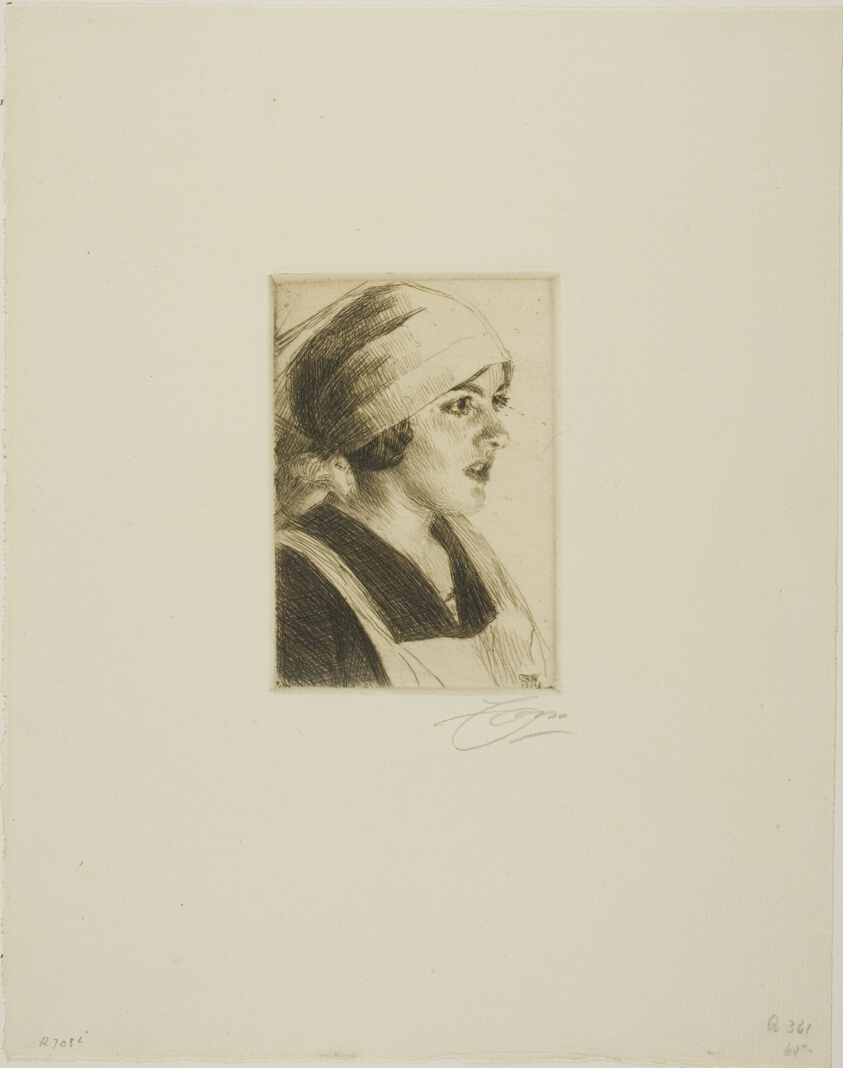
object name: Print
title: Gulli I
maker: Anders Zorn (Swedish, 1860-1920)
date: 1914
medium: Etching on ivory laid paper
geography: Sweden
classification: etching; print; prints and drawing